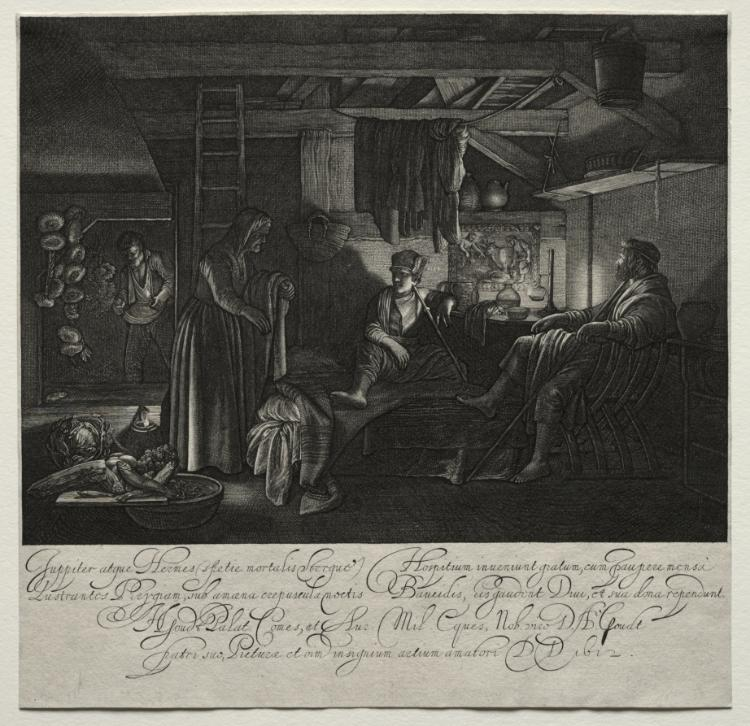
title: Jupiter and Mercury at the House of Philemon and Baucis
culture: Netherlands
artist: Hendrik Goudt (Dutch, 1583–1648)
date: 1613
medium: engraving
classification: Print